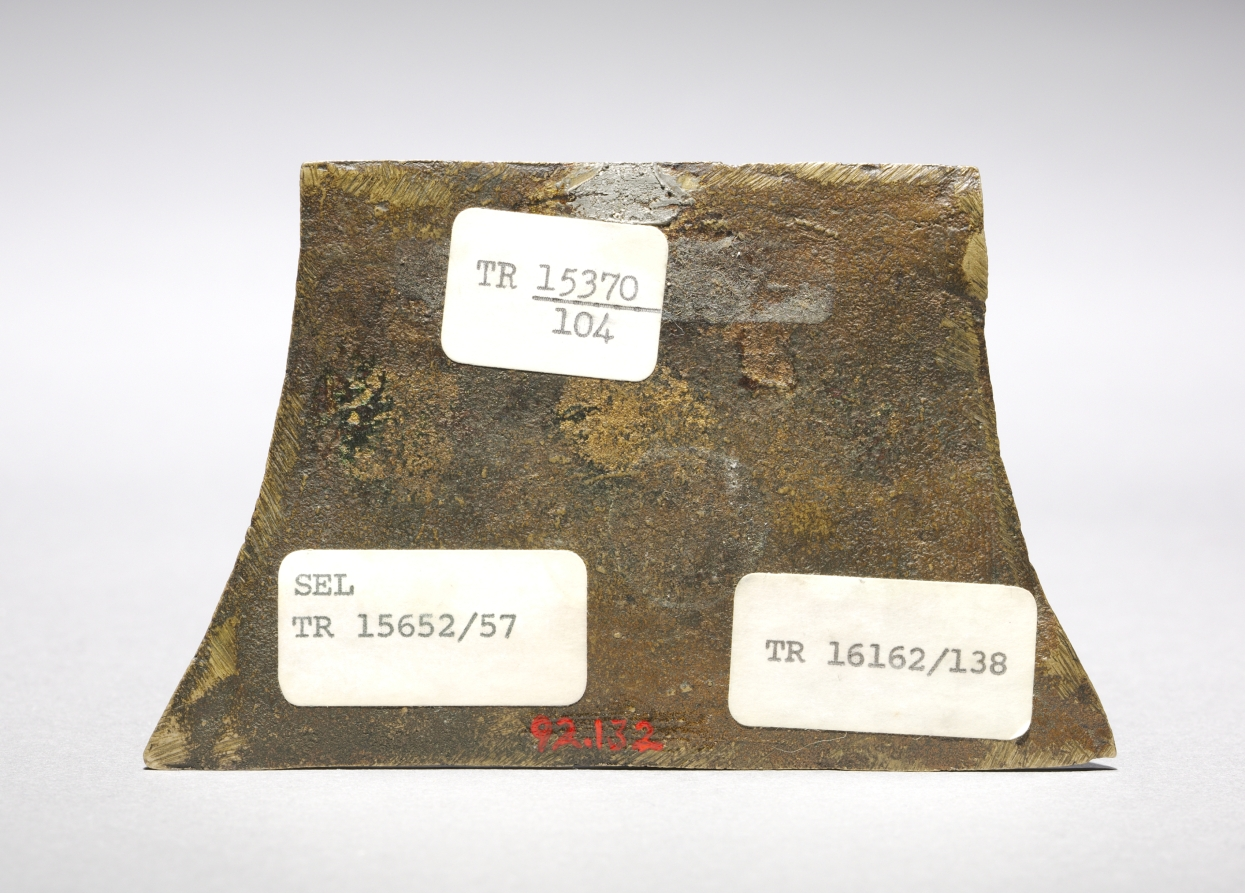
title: Christ Washing the Feet of the Apostles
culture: Italy, 16th century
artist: Valerio Belli (Italian, c. 1468–1546)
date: 1500s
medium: bronze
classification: Sculpture